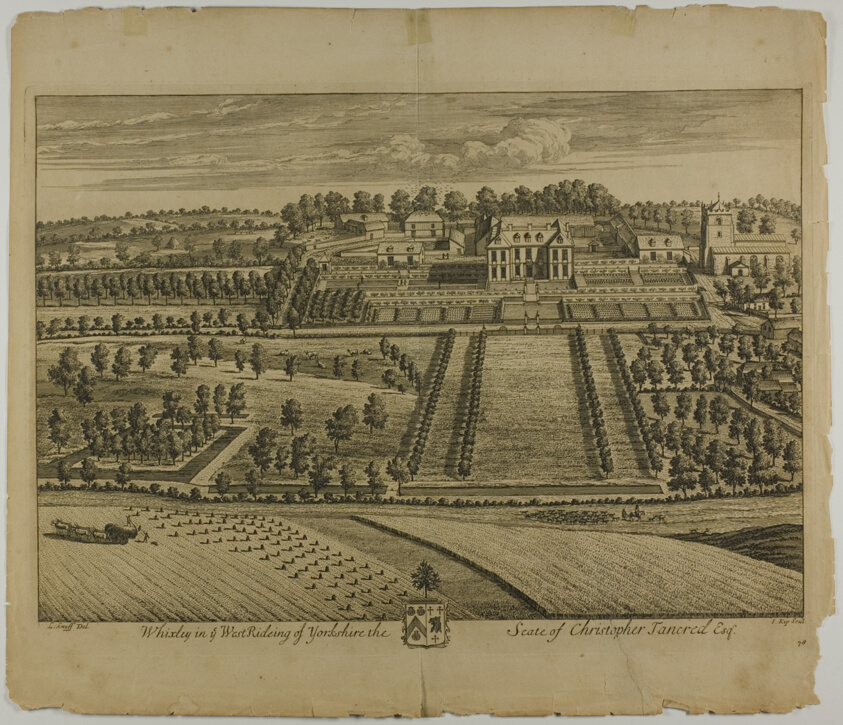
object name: Print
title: Whixley, plate 78 from Britannia Illustrata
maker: Jan Kip (Dutch, c. 1653-1722); after Leonard Knyff (Dutch, 1650-1721); published by David Mortier (French, 1673-1728)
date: published 1707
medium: Etching and engraving in black on cream laid paper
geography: Netherlands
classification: prints and drawing; engraving; etching; print